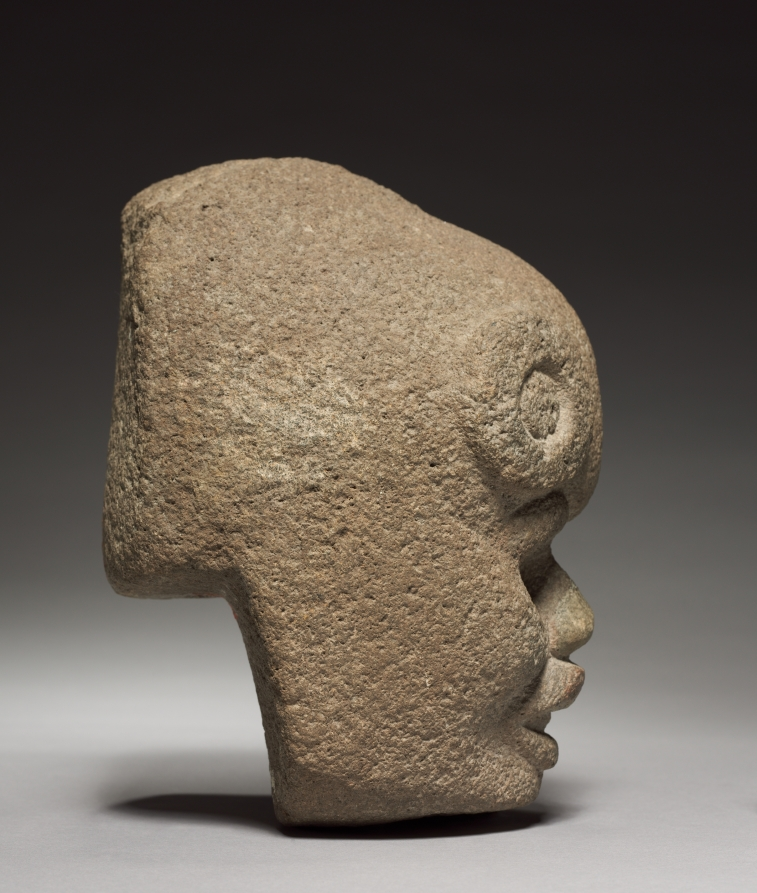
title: Head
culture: Mexico, Classic Veracruz (Totonac or Tajin)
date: 600–1100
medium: stone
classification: Sculpture